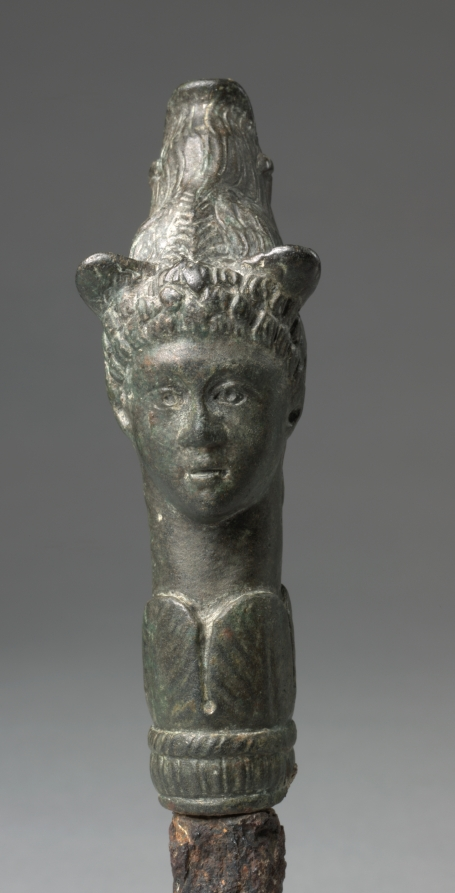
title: Key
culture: Italy, Roman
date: 1–100 CE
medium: iron tang, bronze handle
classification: Metalwork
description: Cleverly designed with an iron bit attached to a bronze handle, this key can be admired from all angles. While the handle terminates in the head of a ferocious boar, farther down are back-to-back heads of Mercury—his wings formed from the ears of the boar—and his goat-legged, horned son, Silvanus (also known as Pan). Given the rustic nature of the heads, scholars have suggested that the key might once have unlocked a country villa.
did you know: The bronze handle of this key combines three heads: of a boar, Mercury, and Silvanus.